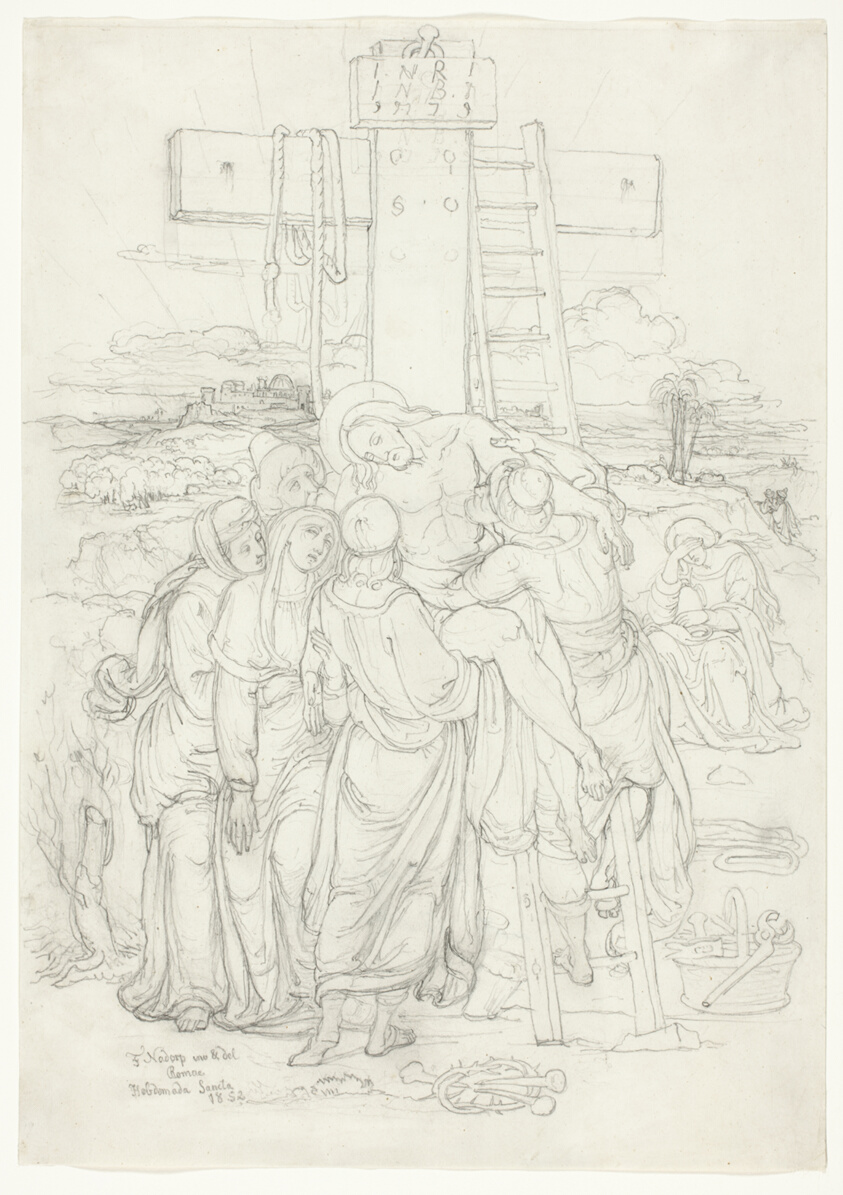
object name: Drawing and Watercolor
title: Descent from the Cross with a Silhouette of Jerusalem in the Background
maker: Franz Johann Heinrich Nadorp (German, 1794-1876)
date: 1852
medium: Graphite, with smudging, on ivory wove paper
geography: Germany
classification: graphite; prints and drawing; paper; drawings (visual works)